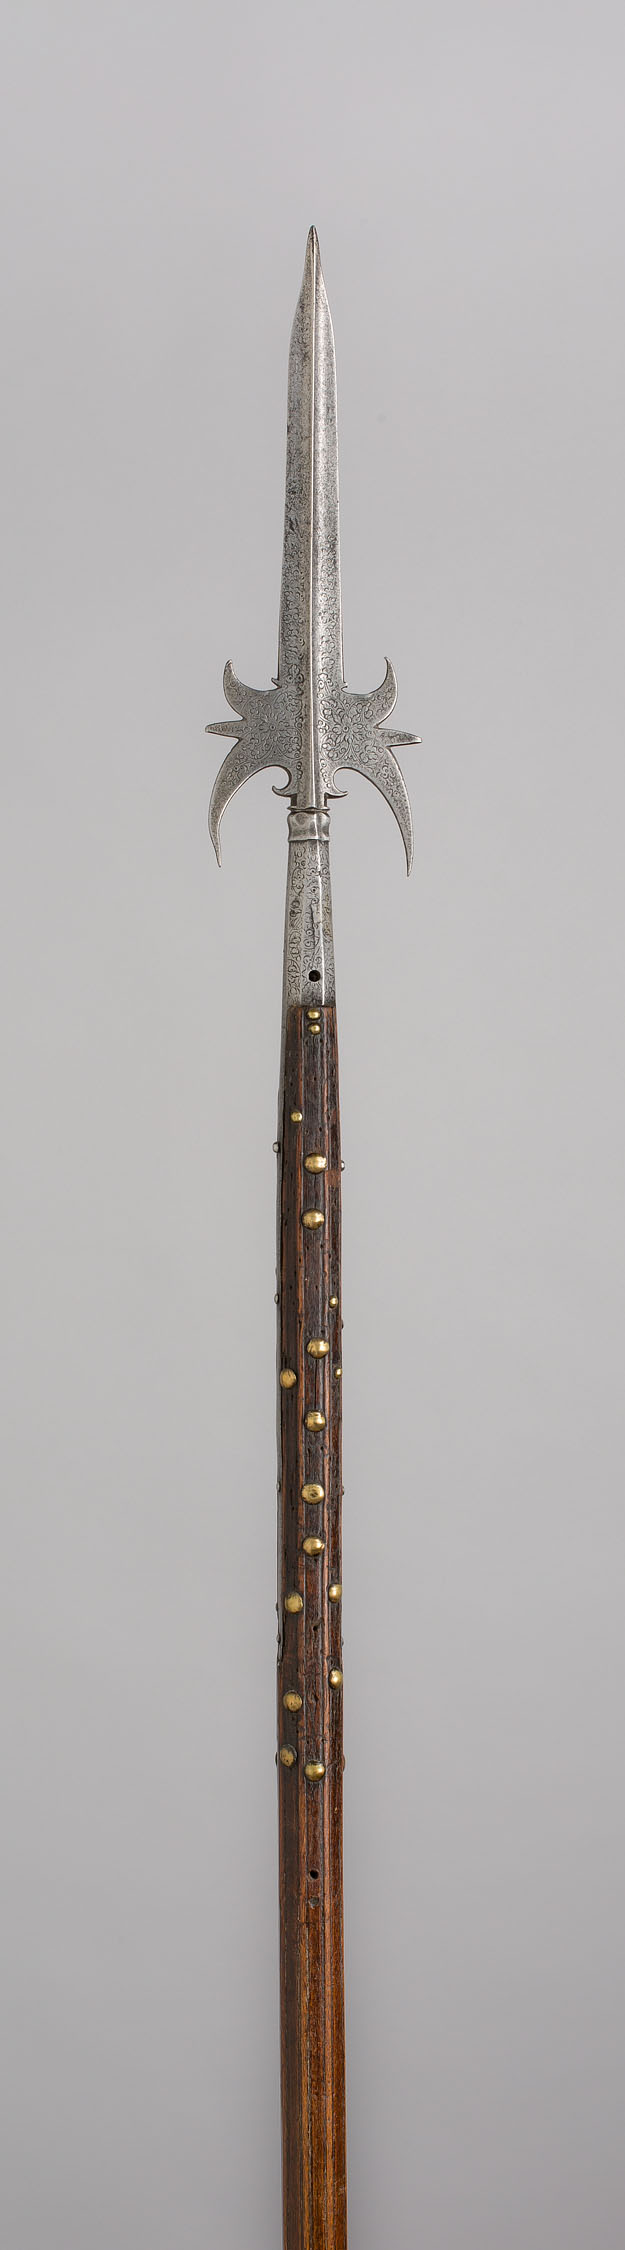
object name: Arms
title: Partisan - Leading Staff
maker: Italian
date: 1600/1700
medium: Steel, wood (pine), brass, and iron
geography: Italy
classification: edged weapon-staff; arms; arms and armor